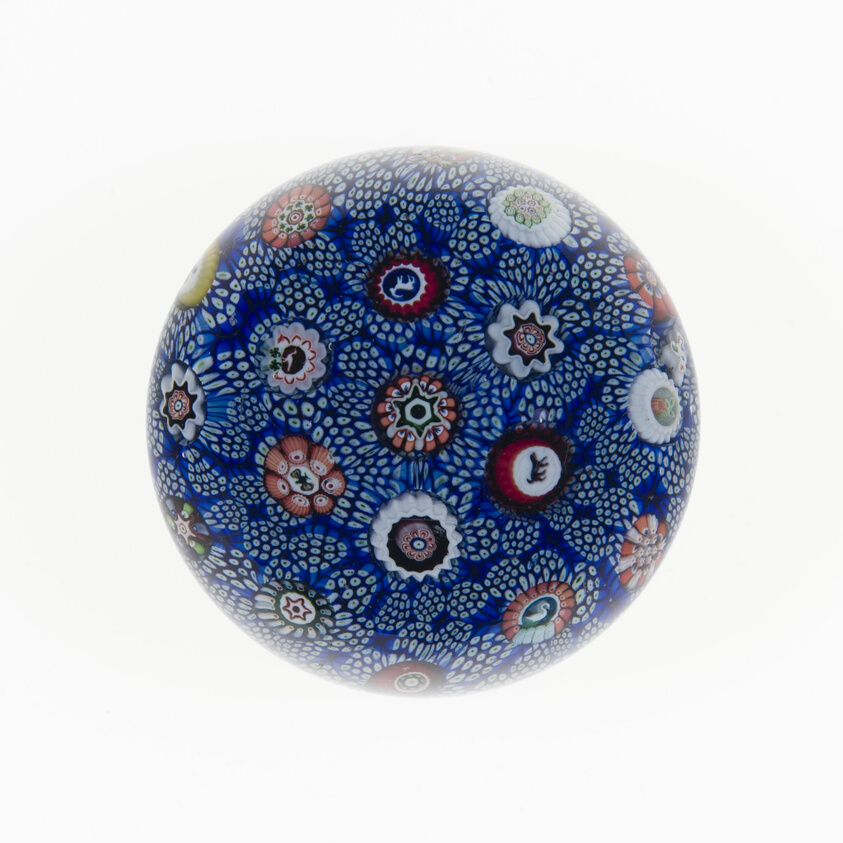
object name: Glass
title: Paperweight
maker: Baccarat Glassworks (Cristalleries de Baccarat); Lorraine, France, founded 1764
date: 19th century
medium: Glass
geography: Lunéville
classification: paperweight; millefiori; european decorative arts; glass